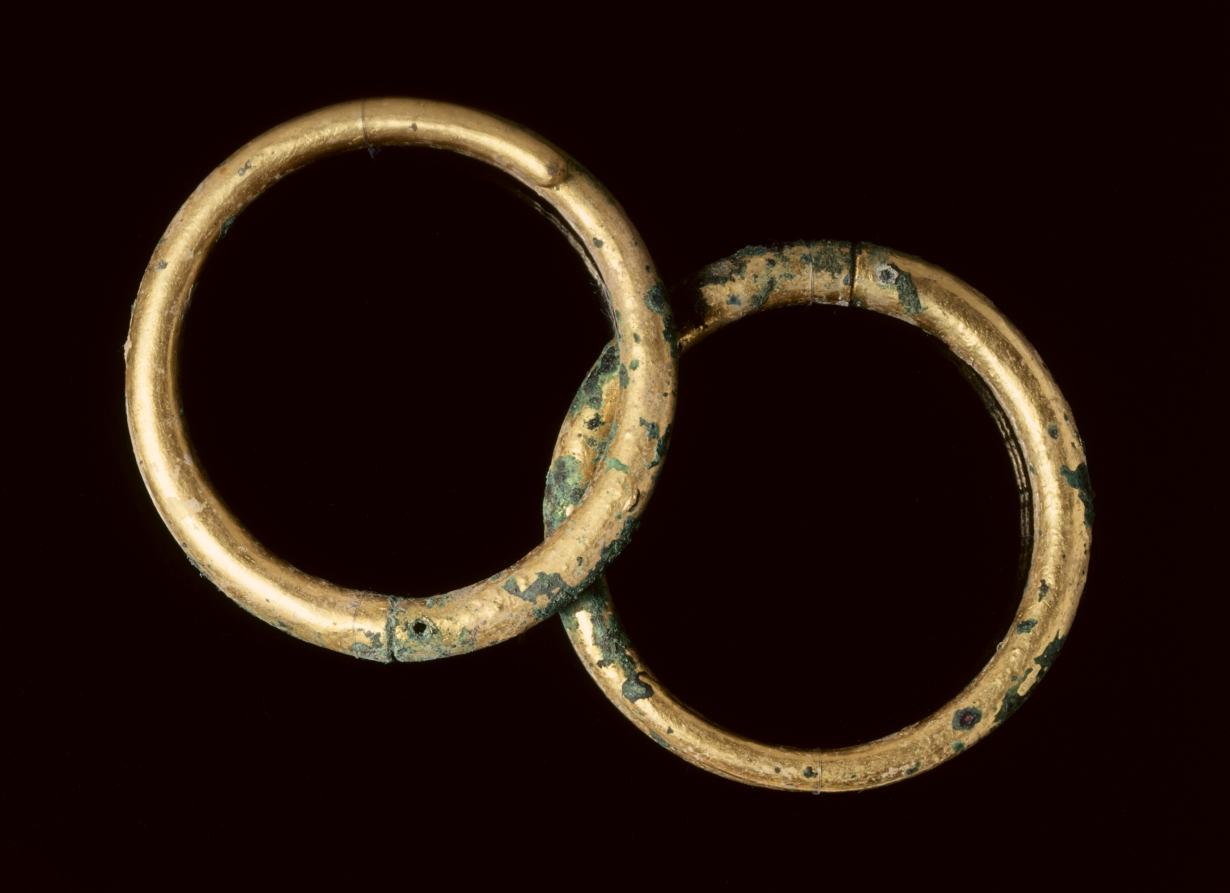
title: Pair of Bangles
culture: India, Shunga period (185–78 BCE)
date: 185–72 BCE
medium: gilt bronze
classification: Jewelry